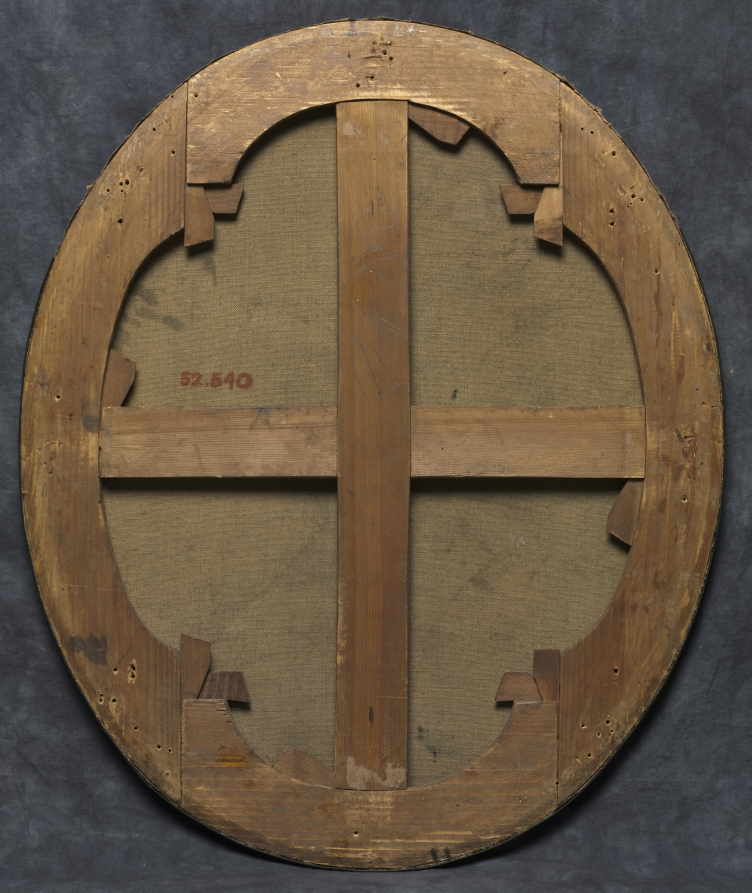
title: Summer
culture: France, 18th century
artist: Jean-Baptiste Pater (French, 1695–1736)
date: c. 1720–1736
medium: oil on canvas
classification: Painting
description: Spring and Summer are two scenes from a series of the four seasons. Both Autumn and Winter are now in the Museu d'Art de Catalunya in Barcelona. These landscapes were originally a part of a screen or a decorative panel, as indicated by their floral borders and oval shape. The setting of Spring is believed to be the grounds of Montmorency, the country estate of Pierre Crozat (1665-1740), a wealthy financier and art collector in early eighteenth-century Paris. The walkway is very similar to other scenes by Watteau known to depict the estate of his close friend and patron Crozat. As a student of Watteau, Pater would have also been familiar with this setting. Summer counters Spring's aristocratic leisure by depicting rural labor. However, befitting the work's decorative origins, Pater's scene belongs to the tradition of the timeless pastoral. More idyllic than a statement about class differences, the reapers peacefully gather sheaves of wheat as shepherds rest with their flocks in the foreground.